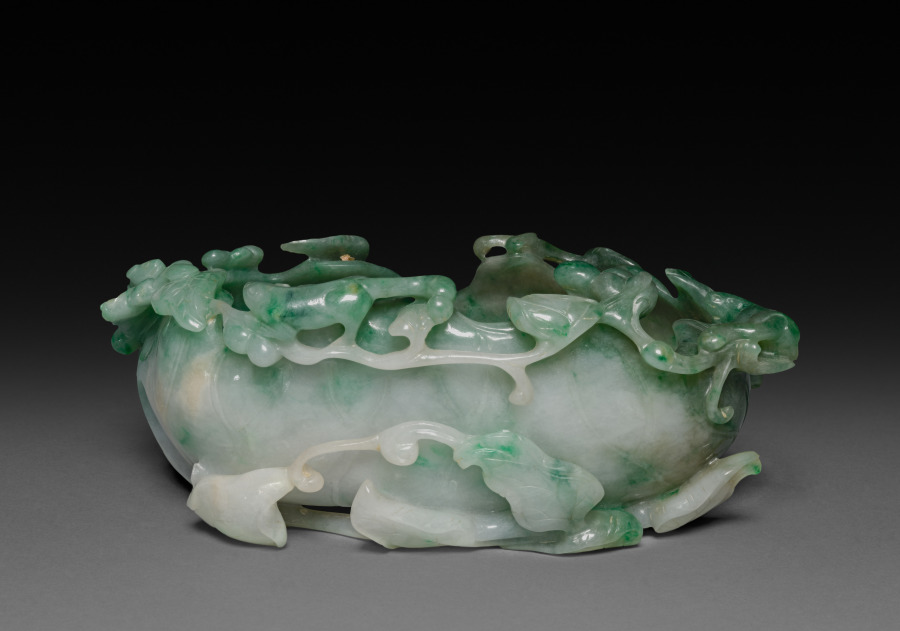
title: Brushwasher in Shape of Lotus Leaf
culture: China, Qing dynasty (1644-1911)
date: 19th Century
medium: translucent jadeite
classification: Jade